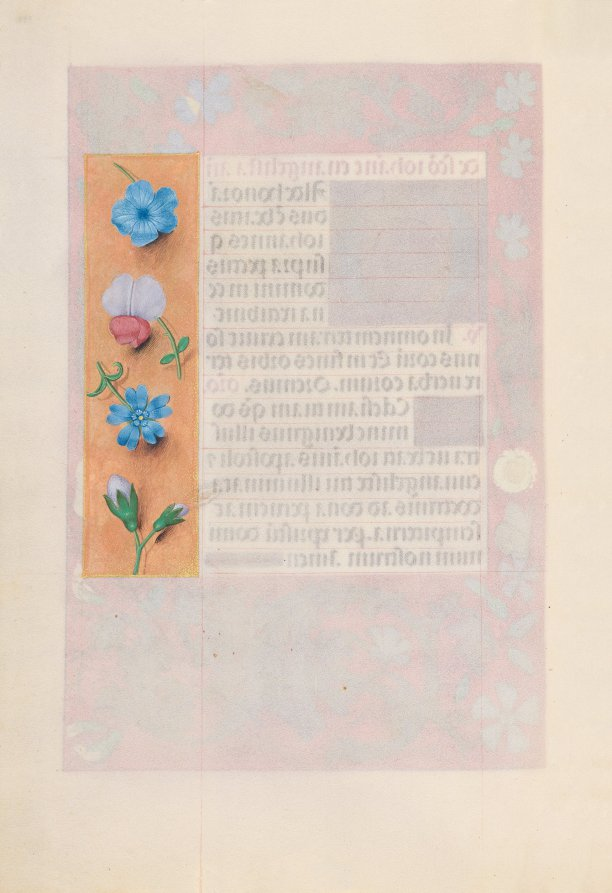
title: Hours of Queen Isabella the Catholic, Queen of Spain: Fol. 172v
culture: Flanders, Ghent and Bruges, late 15th century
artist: Master of the First Prayerbook of Maximillian (Flemish, c. 1444–1519)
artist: and Associates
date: c. 1500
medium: ink, tempera, and gold on vellum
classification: Bound Volume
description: This manuscript was illuminated by a circle of at least five highly organized manuscript painters active in the Flemish cities of Ghent and Bruges. The principal illuminator was Alexander Bening, who painted the majority of the book's miniatures. Manuscripts produced by this circle of artists are renowned for the decoration of their borders, which typically feature a rich variety of realistically-painted flowers, birds, and butterflies. This prayer book, called a book of hours, was intended not for a cleric, but for the private devotions of a lay person-in this case, Isabella the Catholic, Queen of Spain (1451-1504). Isabella's coat of arms embellishes the book's frontispiece. It is unlikely that the book was commissioned by the Queen herself; rather, she probably received it as a diplomatic gift from someone courting her patronage, perhaps Cardinal Francisco Jimenez de Cisneros. A Franciscan friar, Jimenez was dependent upon Isabella for his advancement, first to the post of Queen's confessor in 1492, and then to Archbishop of Toledo in 1495.